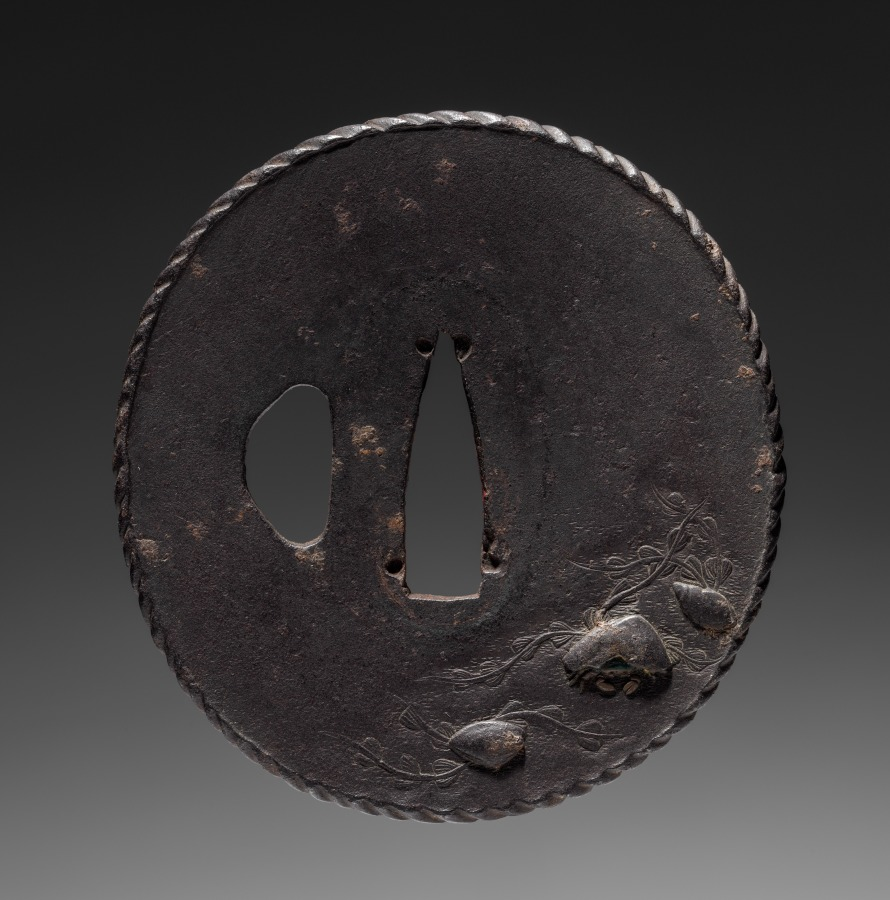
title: Sword Guard (Tsuba) with Hermit Crab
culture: Japan, possibly Edo period (1615-1868)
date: c. 1615–1868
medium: iron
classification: Arms and Armor